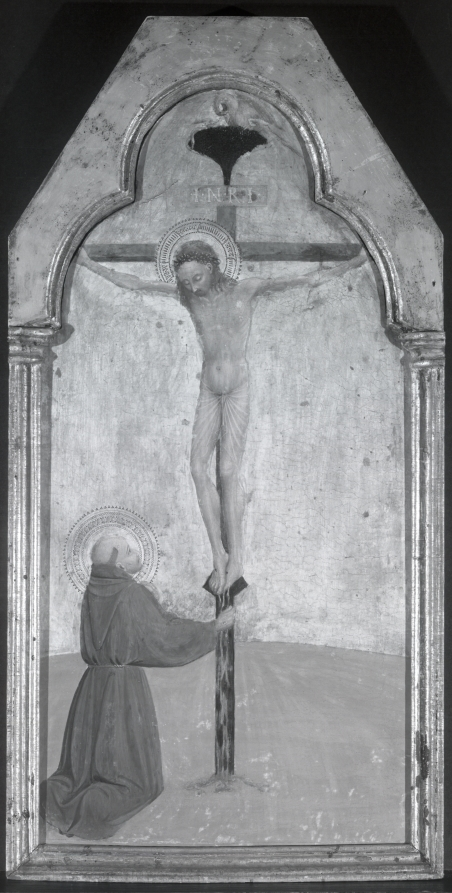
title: St. Francis Kneeling before Christ on the Cross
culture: Italy, 15th century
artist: Sassetta (Italian, 1392–1450)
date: 1437–1444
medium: tempera and gold on wood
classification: Painting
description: Because of his simplicity, piety, and devotion to all living creatures, Saint Francis (1181–1226) has remained among the most revered and popular saints. Born to wealthy parents in Assisi, he first lived a life of spendthrift luxury. However, Francis later gave up all worldly goods and embraced an existence of utter poverty. Throughout his adult life, the saint experienced mystical trances and visions of Christ. Atop the cross here is a leafy tree and a nest of pelicans. Fifteenth-century viewers would have recognized the tree as a reference to the cross, which is often described as a tree, symbolizing Christ's role as the source of eternal life. The pelican, shown nourishing its young with its own blood, symbolizes Christ, who sacrifices himself for the salvation of mankind. This painting was the center pinnacle on the back of a double-sided altarpiece made for the church of San Francesco in Borgo Sansepolcro (near Arezzo).